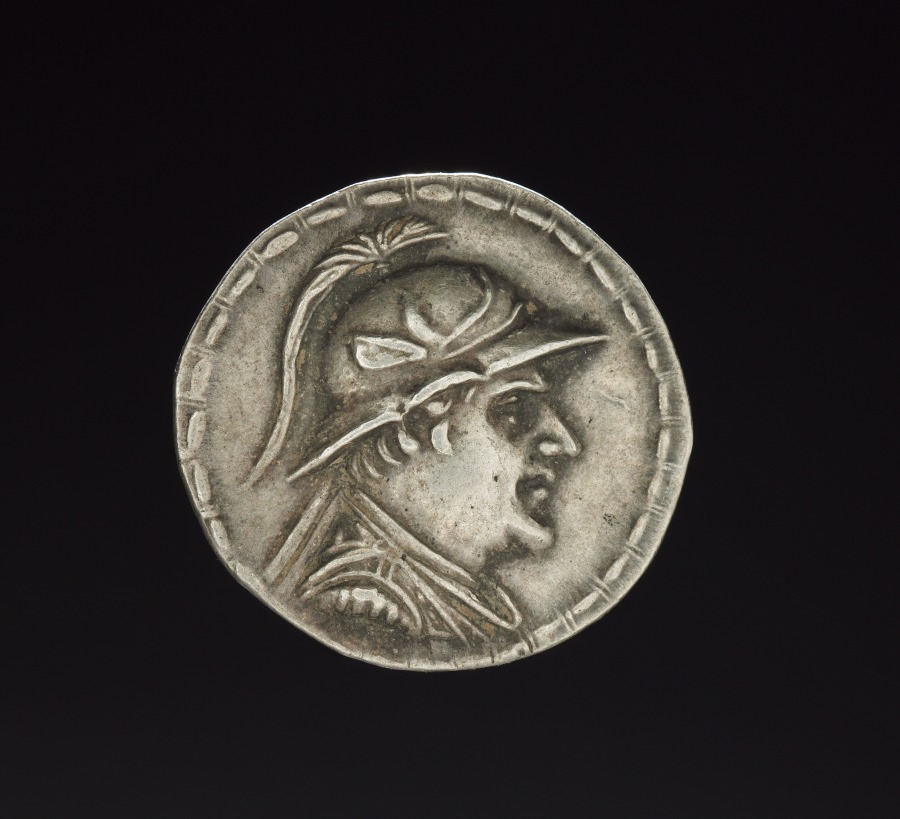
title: Coin of Eukratides I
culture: Afghanistan, Bactria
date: 170–145 BCE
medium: silver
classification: Silver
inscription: BASILEOS MEGALOU EUKRATIDOU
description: Eukratides, a successor of Alexander in Bactria, wears a helmet with bull's ear and horn, like military leaders from Macedon, Alexander's homeland in the north of Greece. On the reverse Castor and Pollux, sons of Zeus, ride horseback. Because Alexander also was considered to be an offspring of Zeus, Eukratides referenced his link to Alexander by including Castor and Pollux on his coin.